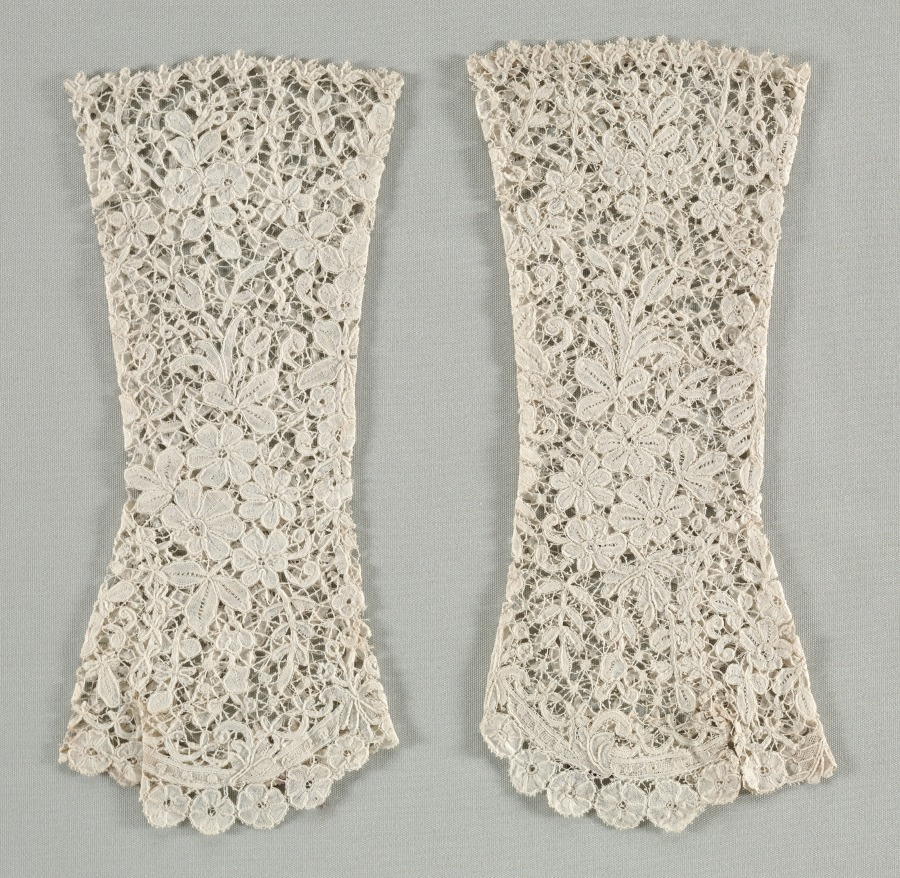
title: Pair of Gloves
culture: Flanders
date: c. 1850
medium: Bobbin lace (Duchese lace)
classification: Lace